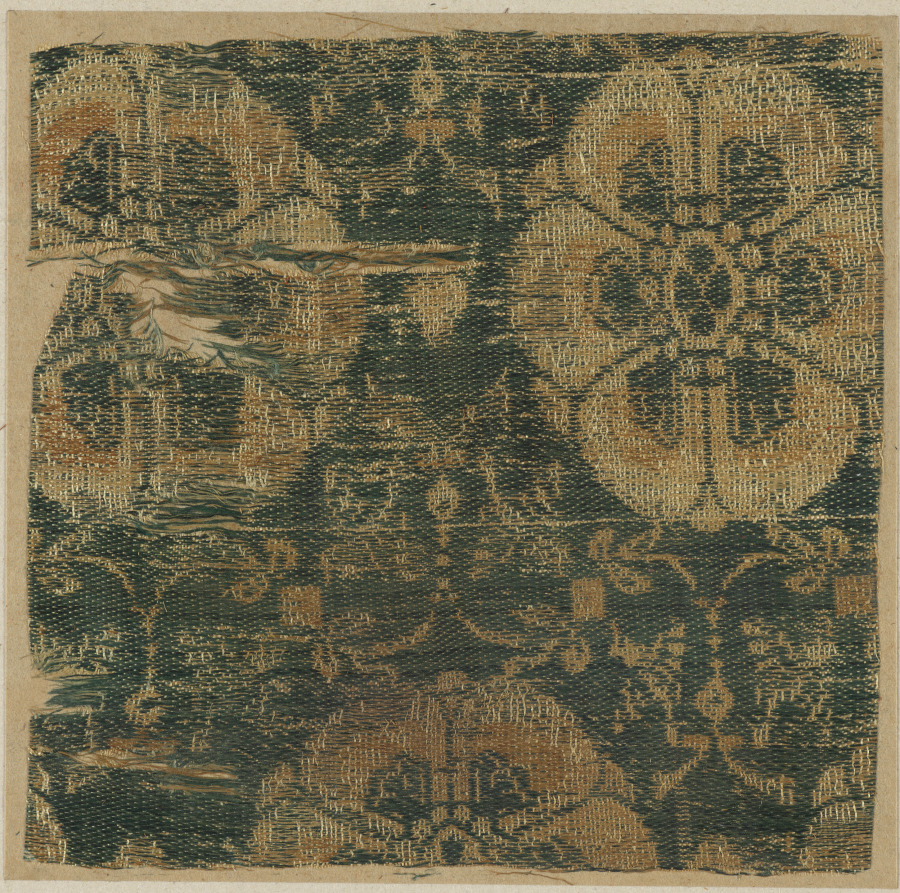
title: Fragment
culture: China or Japan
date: 700s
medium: compound twill, silk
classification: Textile